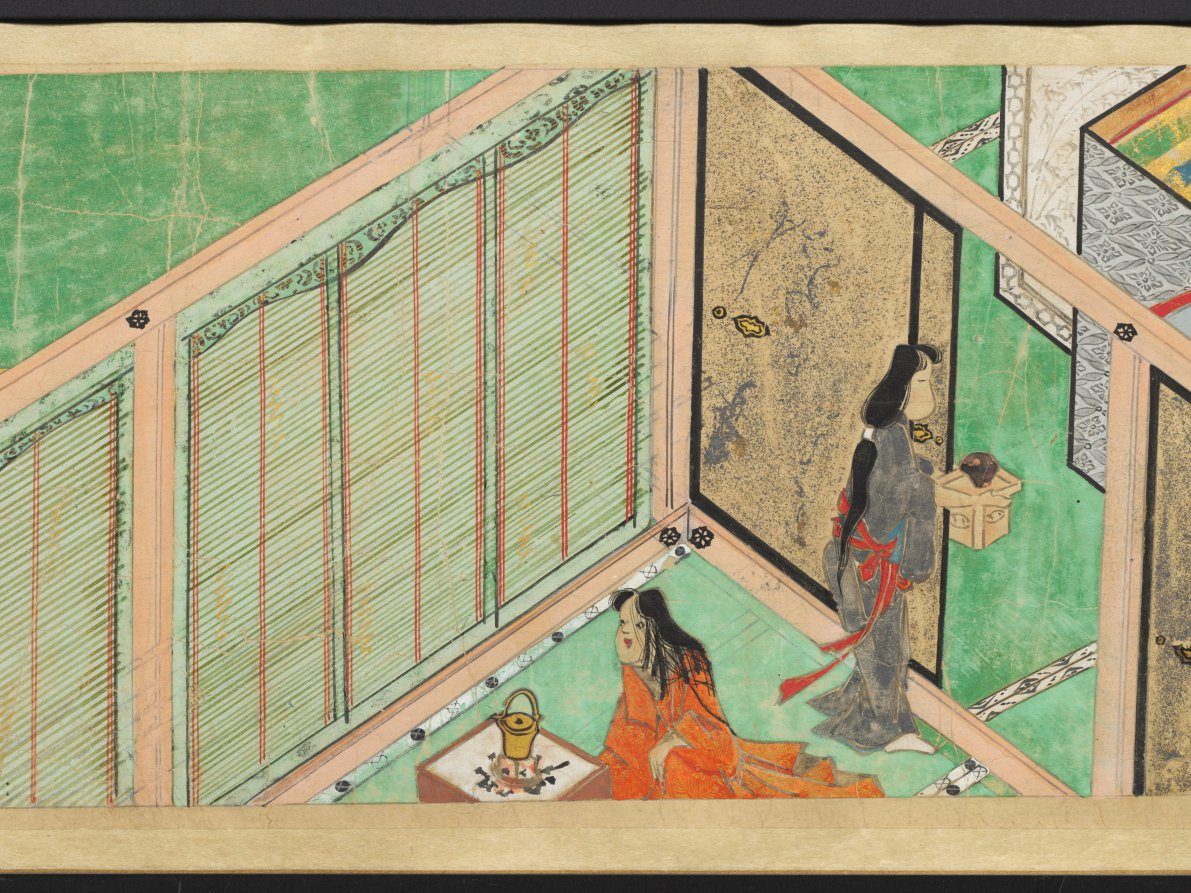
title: The Saltmaker's Story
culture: Japan, Edo period (1615–1868)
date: early 1600s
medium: One of a pair of handscrolls; ink, color, and gold on paper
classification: Painting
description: Once read and copied by girls at New Year’s celebrations and included in dowries, The Saltmaker’s Story is a rags-to-riches tale in which daughters are gifts from the gods. Despite his simple outlook, the main character progresses from humble roots as an associate at Kashima Shrine to the elite status of grandfather of the emperor through the intervention of the Kashima deity. The Saltmaker’s Story is traditionally presented in a set of three scrolls, but the text of this set has been removed by a previous owner, who remounted the illustrations as a pair. The paintings of this one take us from right to left through the first half of the tale.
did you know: This handscroll originally had texts before its paintings, but the texts were removed.